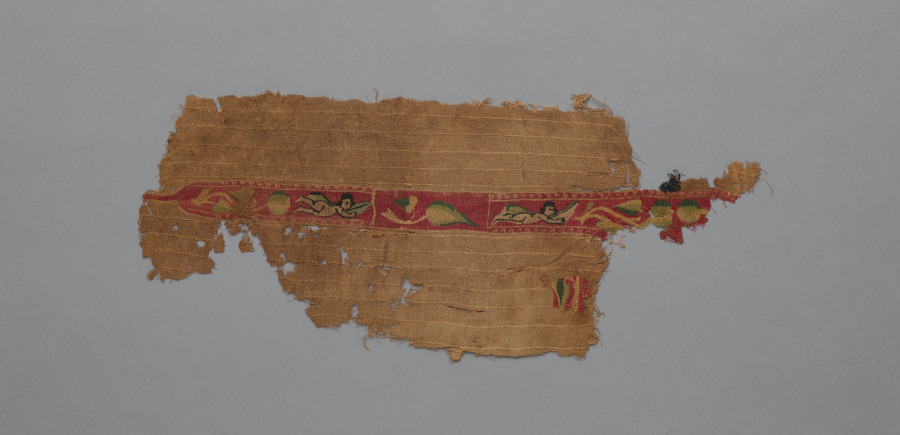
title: Fragment from a Tunic: Clavi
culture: Egypt, Umayyad period (661–750)?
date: 600s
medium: tabby weave, inwoven tapestry ornament; wool and linen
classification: Textile